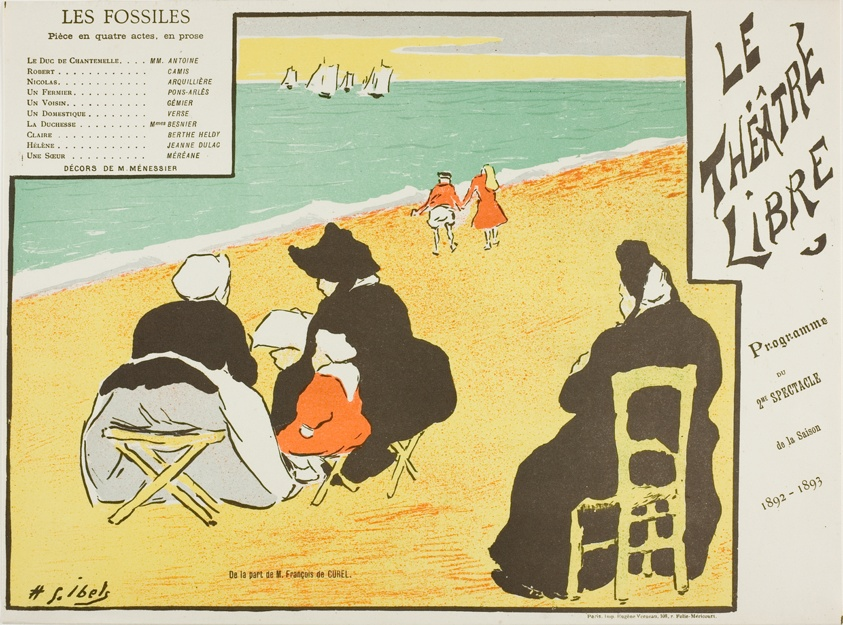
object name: Print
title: Second Performance: Les Fossiles, for Le Théatre Libre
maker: Henri-Gabriel Ibels (French, 1867-1936); printed by Imprimerie Eugène Verneau (French, 19th century-1906)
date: 1892–93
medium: Color lithograph on ivory wove paper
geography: France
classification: lithograph; print; prints and drawing